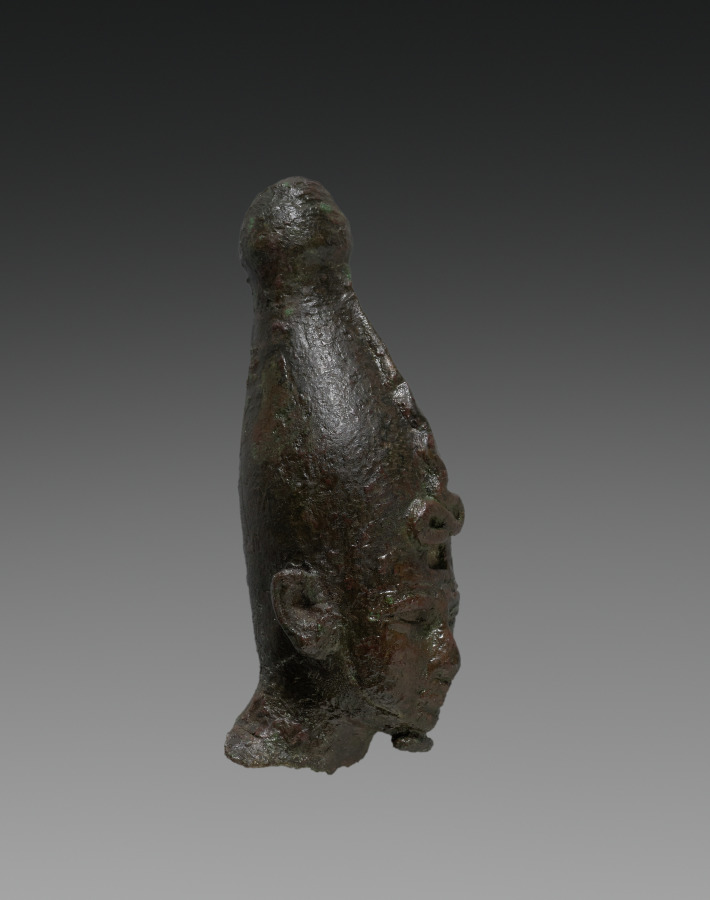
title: Statuette of Osiris (head)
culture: Egypt, Late period (715–332 BCE), Dynasty 26 or later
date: 664–525 BCE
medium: black copper (?), hollow cast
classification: Sculpture